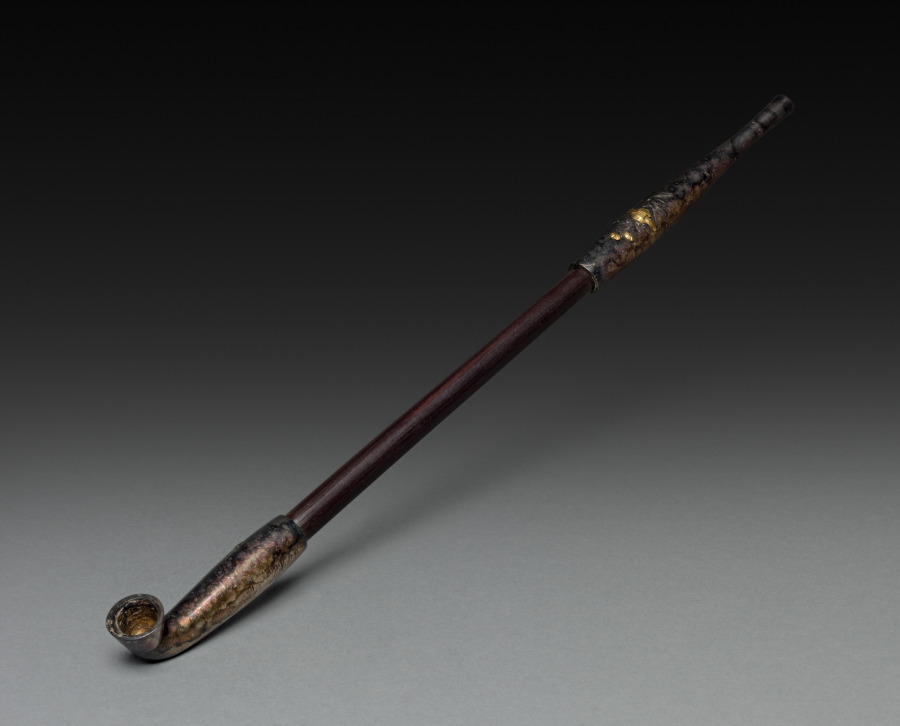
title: Tobacco Pipe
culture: Japan, Edo period (1615–1868) to Meiji period (1868–1912)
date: 1800s–early 1900s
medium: wood and silver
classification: Miscellaneous